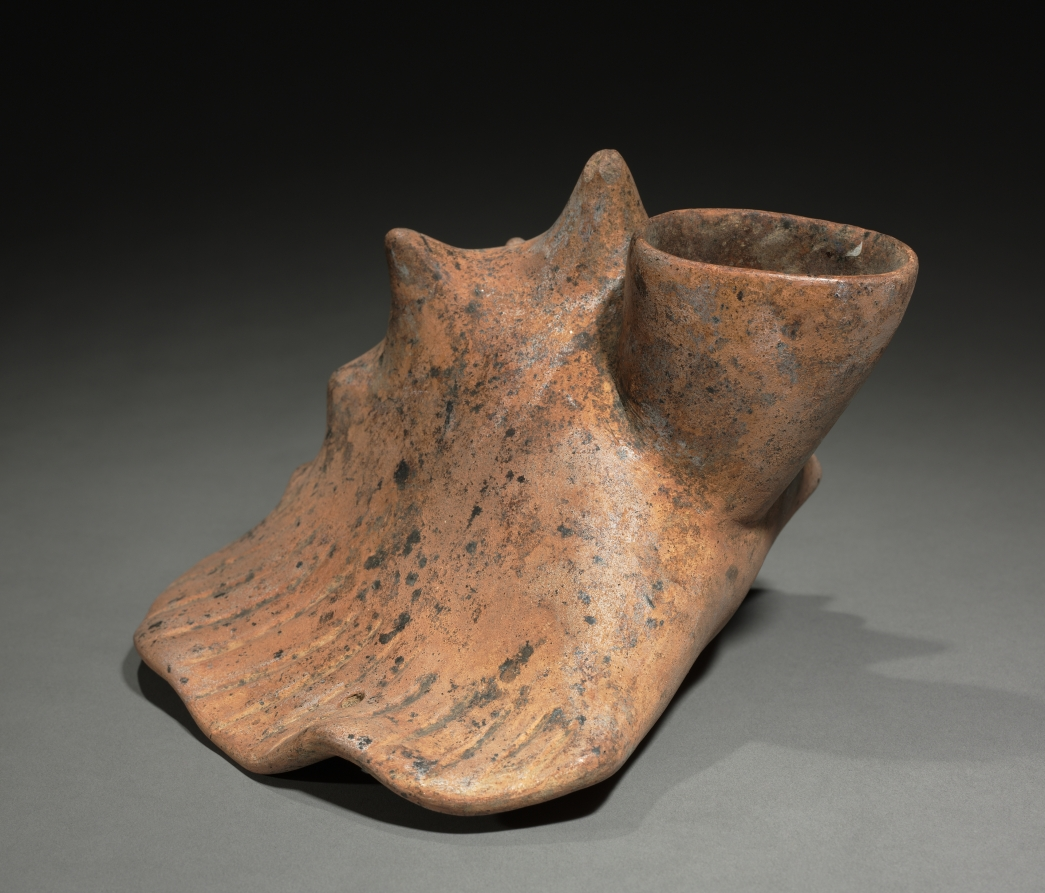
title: Conch Shell Trumpet Vessel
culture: West Mexico, Colima, Comala style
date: 200 BCE–300 CE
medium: earthenware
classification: Ceramic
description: Conch shell trumpets were used during many kinds of important events throughout the ancient Americas. The shells were converted to trumpets by removing the tip to form a mouthpiece, as this ancient ceramic replica of a trumpet shows. Holes were often drilled in the shell for a carrying cord.